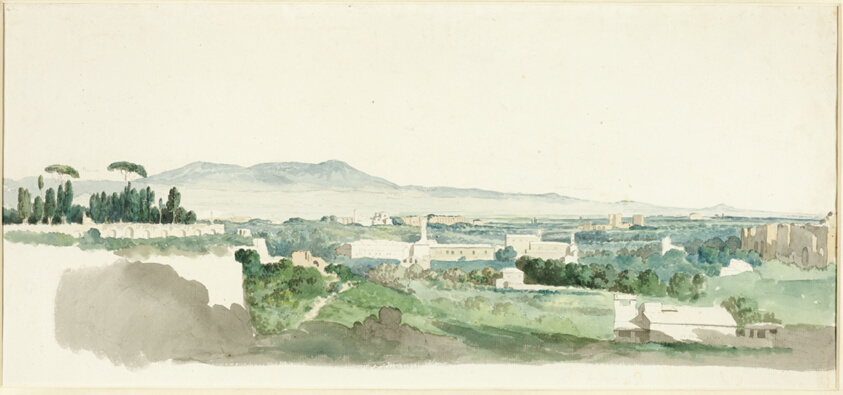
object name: Drawing and Watercolor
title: A View from the Palatine Hill, Rome, the Alban Hills in the Distance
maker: Carlo Labruzzi (Italian, 1748-1818)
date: c. 1775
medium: Watercolor, over graphite, on ivory laid paper, laid down on white laid paper, folded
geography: Italy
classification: paper; watercolor; prints and drawing